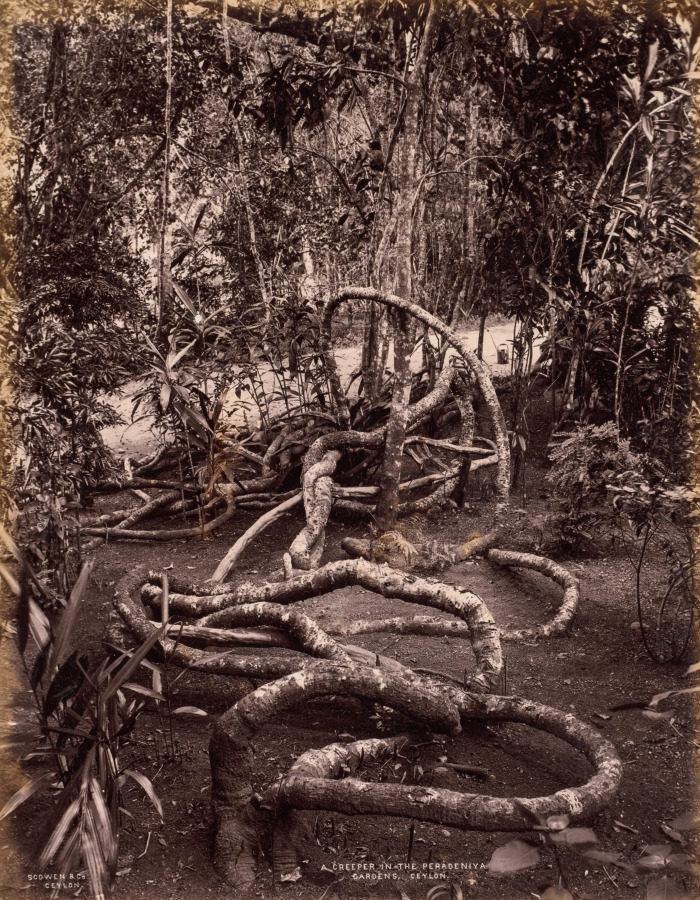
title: A Creeper in the Peradeniya Gardens, Ceylon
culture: India, 19th century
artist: Scowen & Co. (British, active Ceylon, 1876–1895)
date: c. 1880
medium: Albumen print from glass plate negative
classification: Photograph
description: The extravagant baroque curves of this vine were shot in what are now known as the Royal Botanical Gardens. With origins as far back as 1371, the gardens were formally established by the colonial government in 1843 using European plants from Kew Garden in London and native specimens from Slave Island, Colombo, and the Kalutara Garden in Kalutara. Ceylon is now the nation of Sri Lanka.